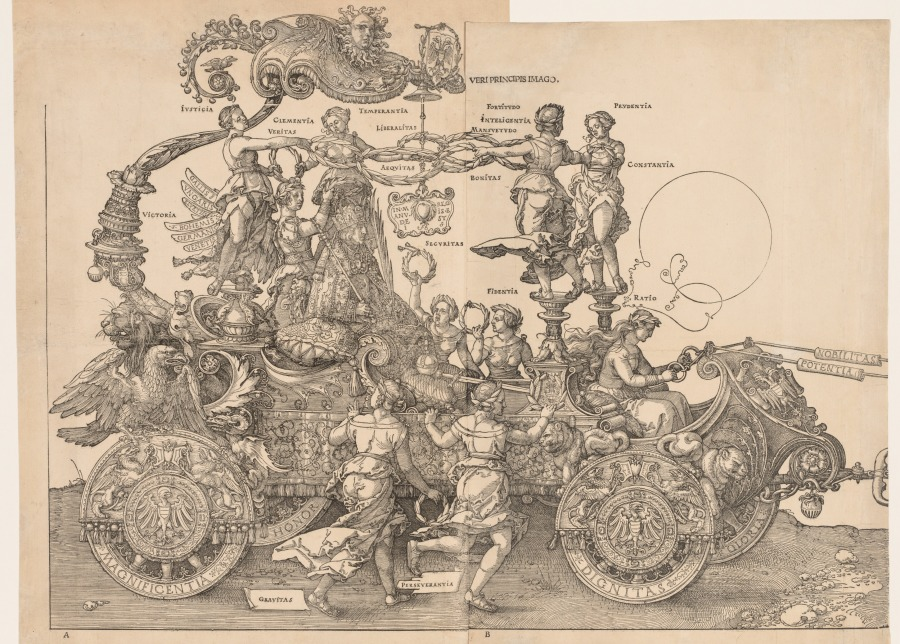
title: The Great Triumphal Car of Emperor Maximilian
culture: Germany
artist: Albrecht Dürer (German, 1471–1528)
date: 1523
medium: woodcut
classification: Print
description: Dürer conceived this fantastical chariot as part of a larger commission to depict Holy Roman Emperor Maximilian I (reigned 1486–1519) in a triumphal procession. The ruler sits enthroned in the lavish car, as Victory holds a laurel wreath above his imperial crown. Her feathered wings list Maximilian’s military campaigns. Nearly every component of the allegorical pageant—from the entourage of female attendants to the laurel garlands—has a Latin label describing honorable qualities of an ideal prince. The car rolls on wheels of Magnificence, Honor, Dignity, and Glory. Its driver is Reason, who guides a team of 12 horses with reins of Nobility and Power. Virtues of Justice, Strength, Wisdom, and Temperance, stand on pedestals arranged around the emperor. Maximilian died in 1519, before the ambitious commission could be completed. Dürer published The Great Triumphal Car at his own expense with text composed by his friend Willibald Pirckheimer (1470–1530).